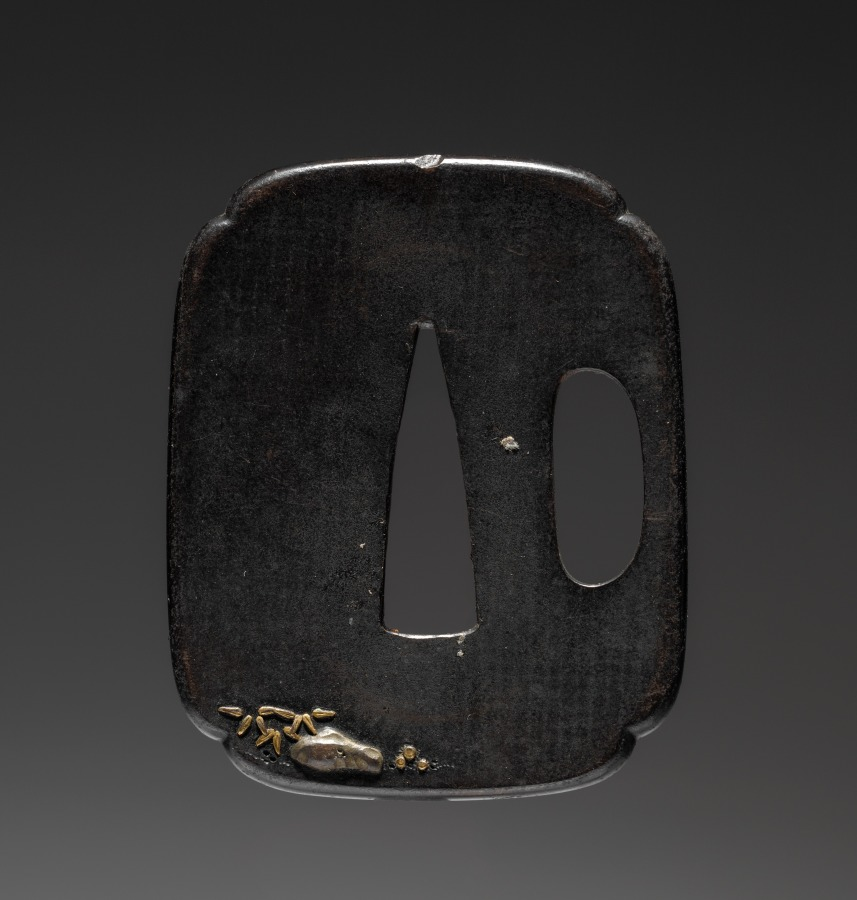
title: Sword Guard (Tsuba) with Dragonfly and Lily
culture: Japan, possibly Edo period (1615–1868)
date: c. 1615–1868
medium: metal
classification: Arms and Armor